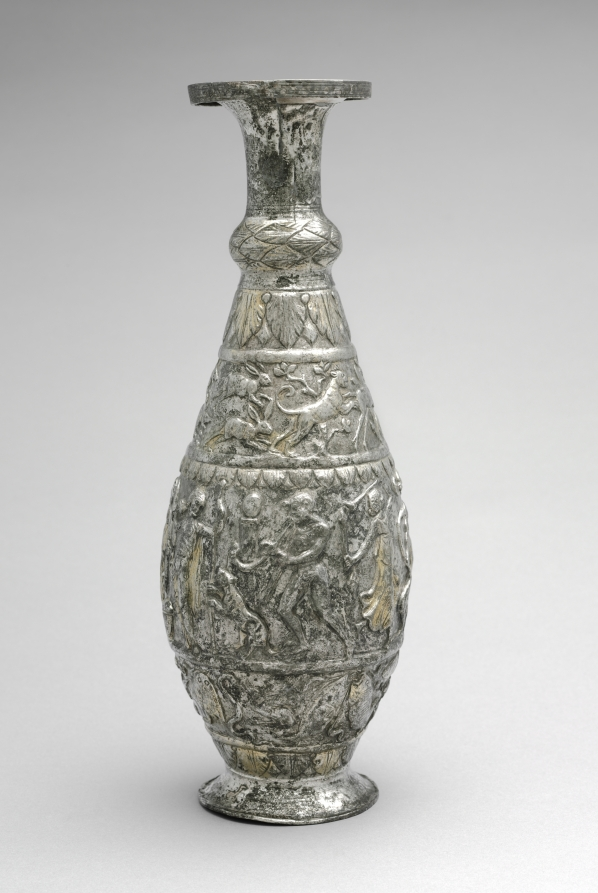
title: Ewer (Pitcher) with Game, Seafood, and Wine Scenes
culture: Byzantium, Syria(?), Byzantine period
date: late 300s CE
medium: silver with traces of gilding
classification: Metalwork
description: This magnificent pitcher, called a ewer, was almost certainly meant for serving wine in the dining room of a wealthy home. On its surface are images in three bands representing the expected bounty of the hunt. Deer pursued by a lioness and hares chased by dogs appear in the top band, signifying the wealth of game the owner hoped to have on the family table. In the lowest band are edible sea creatures, while the center features the merry followers of the Roman wine god Bacchus (Dionysos in Greek).